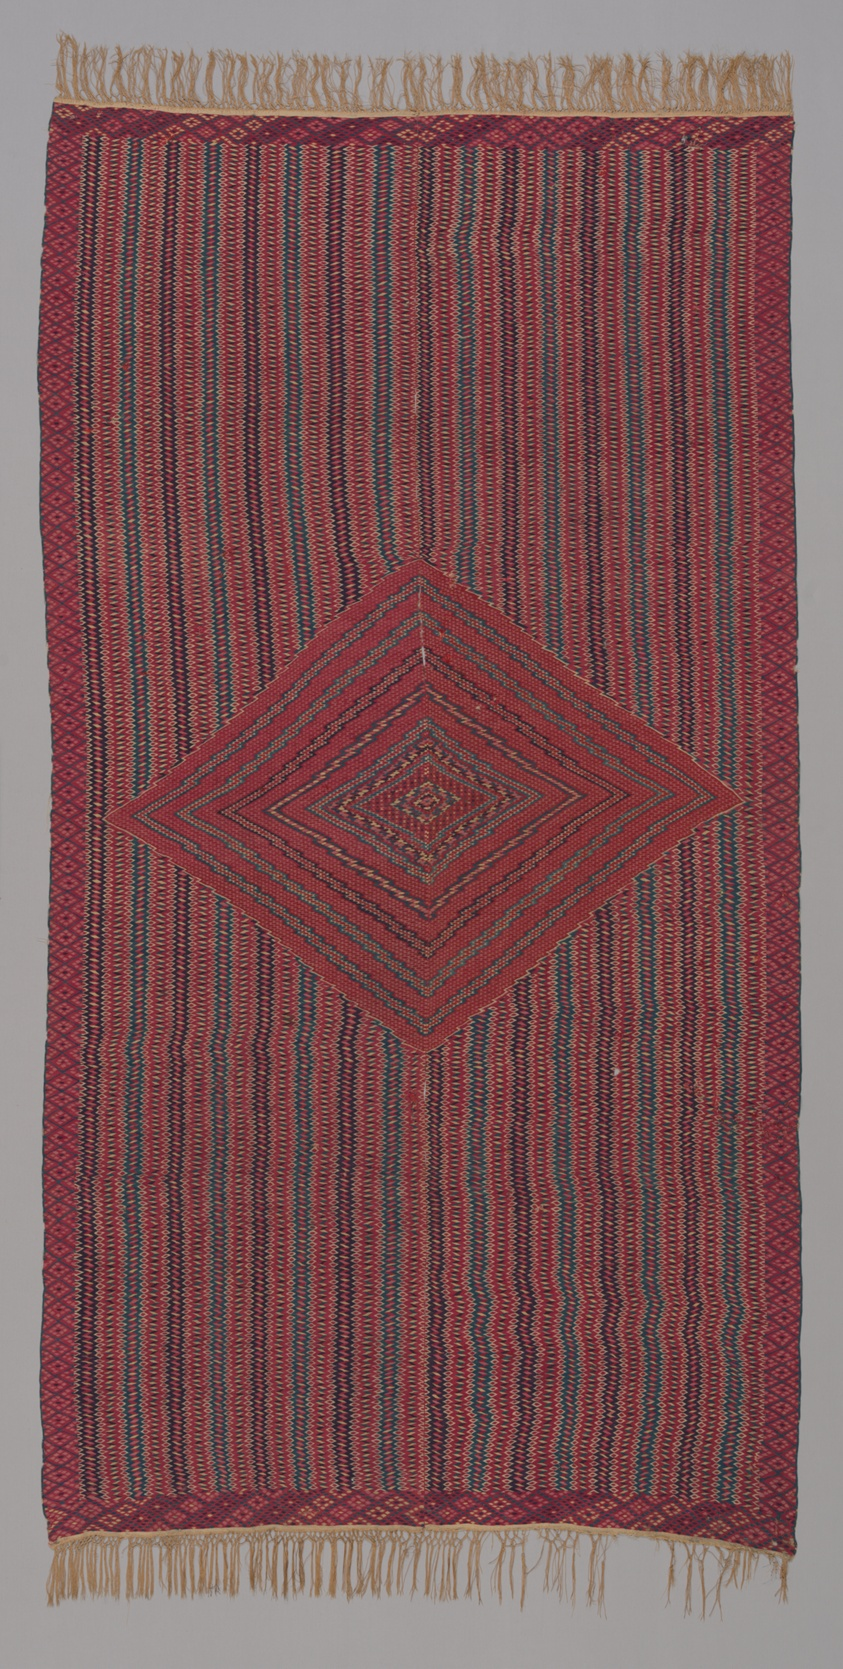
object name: Textile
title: Sarape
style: Folk Art, anasazi, Pre-Columbian, americas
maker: Mexico, possibly Saltillo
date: 1750/1800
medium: Cotton and wool, tapestry weave, slit; single dovetail; attached knotted fringe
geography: Mexico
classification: textile; weaving